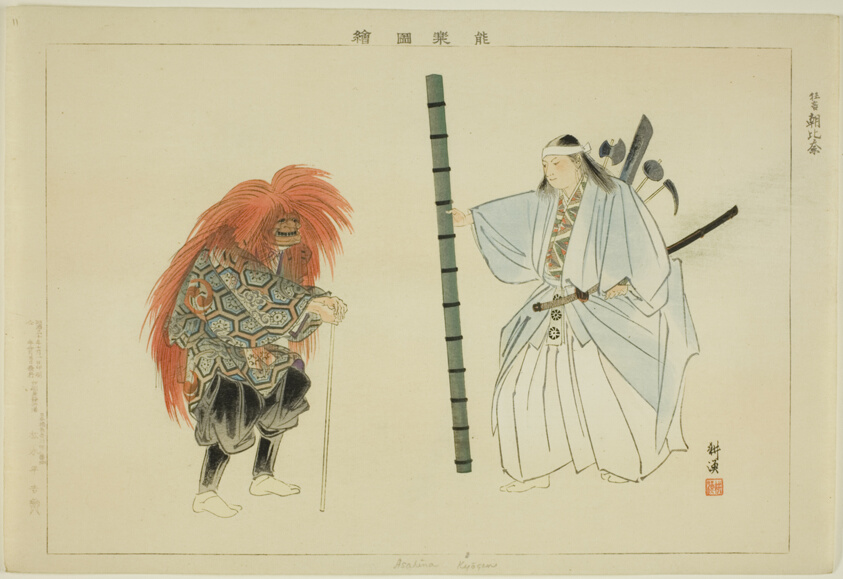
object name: Print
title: Asahina (Kyogen), from the series "Pictures of No Performances (Nogaku Zue)"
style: Japanese (culture or style)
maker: Tsukioka Kogyo; Japanese, 1869-1927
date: 1898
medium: Color woodblock print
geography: Japan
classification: woodblock print; print; asian art